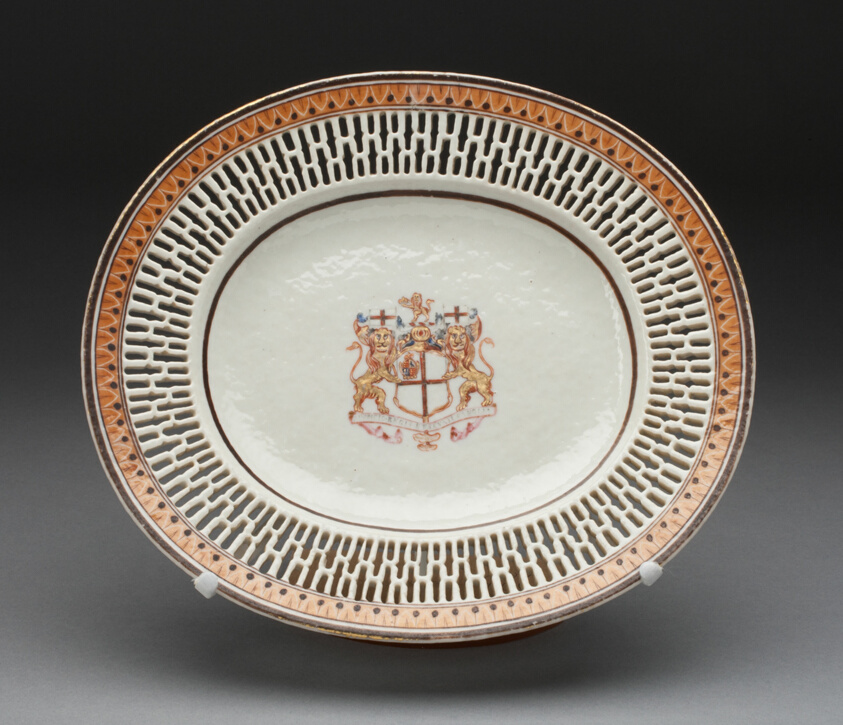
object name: Ceramics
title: Oval Dish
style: chinese export, Chinese (culture or style), East Asian, asian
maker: China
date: c. 1770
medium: Hard-paste porcelain with polychrome enamels and gilding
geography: Jingdezhen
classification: dish (vessel); chinese export porcelain; porcelain; european decorative arts; ceramics